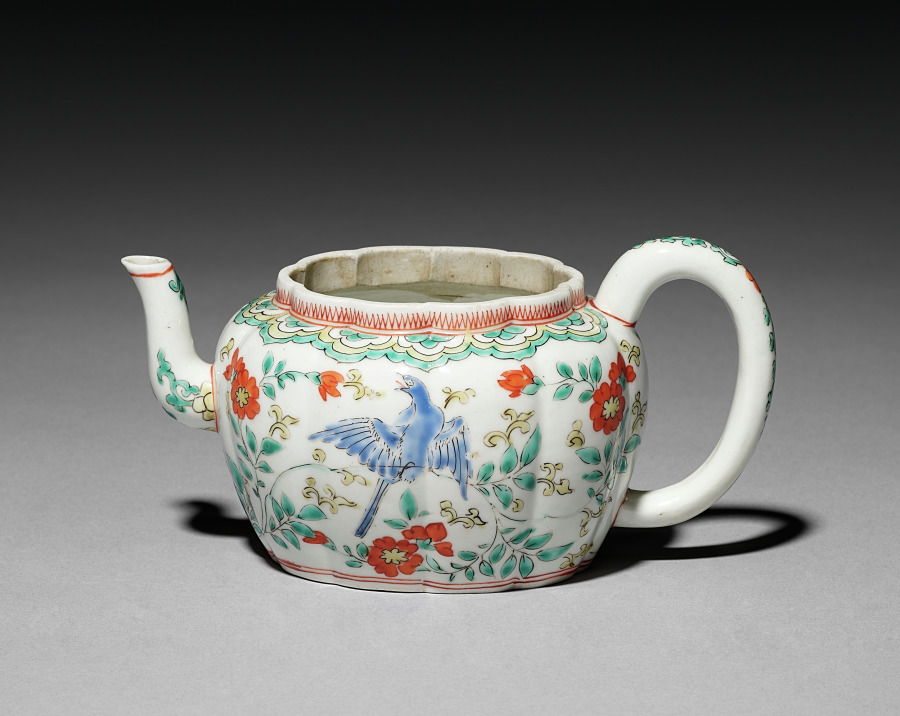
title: Teapot with Birds and Flowers (base)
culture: Japan, Edo period (1615–1868)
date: 1700s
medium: Porcelain with overglaze color enamel (Arita ware)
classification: Ceramic